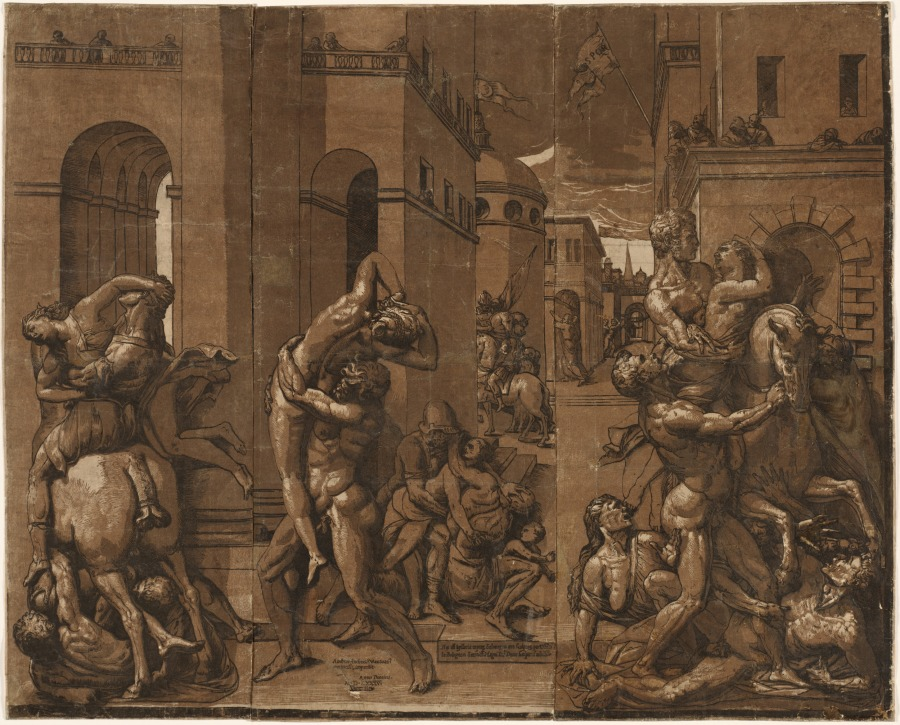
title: The Abduction of the Sabine Women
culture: Italy, 16th century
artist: Andrea Andreani (Italian, about 1558–1610)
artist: after Giambologna (Flemish, active Italy, 1529–1608)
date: 1585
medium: chiaroscuro woodcut (in three shades of brown and black)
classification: Print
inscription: Central sheet in darker tone block: Andreas Andrean' Mantuan' / eam incisit impressit °/ Anno Domini ° / M°D°LXXXV° / Florentiae; hec est hystoria rapta(um) Sabinar(um) in are sculptar(um) per Doum / Io: Bolognam Sereniss. Magni Etre Ducis sculptore celeberr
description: The legend of the Sabine women relates to Rome’s early history when, to ensure the future population of the city, its founder Romulus hosted a festival for neighboring peoples, including the Sabines. At an appointed moment during the festivities, each young man of Rome kidnapped an unmarried Sabine woman to be his bride. Later, when the Sabines attacked Rome, it was the abducted Sabine women who courageously stopped the brutal battle and demanded peace between their fathers, brothers, and husbands. Andreani’s chiaroscuro woodcut, with its brown-red tone, subtle shadows, and warm highlights, was a fitting choice for reproducing Giambologna’s original bronze relief, created for the pedestal of his sculpture The Abduction of a Sabine Woman.